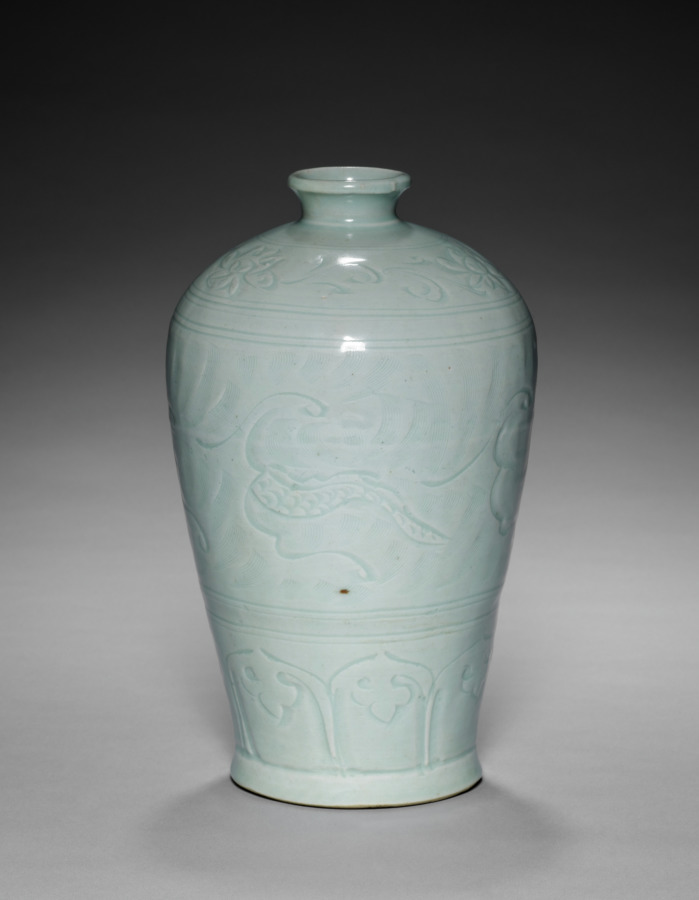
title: Meiping Vase with carved Dragon Motif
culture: South China, Yuan dynasty (1279–1368)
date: 1300s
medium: Porcelain with pale bluish-white (qingbai; 青白) glaze and carved decoration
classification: Ceramic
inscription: There are multiple self-adhesive labels on the bottom: 1. Square white (now yellowed with age) label with "90" written in red ink. 2. White rectangular label with "L.80.17.8" written in pencil. 3. Fabric tape cut to rectangular shape with "L.2161.49 /39" written in black ink. 4. White round label from Lally & Co. New York with "X2295" written in black ink.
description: A fierce coiling dragon chasing a pearl amid mist and clouds—a symbol of fertility and power—decorates this sturdy vase. Its shoulder is incised with a band of lotus flowers and the base features a border of lotus petals. Meiping, literally prunus vase, derives its name from being used to display a single floral spray, traditionally a branch of blossoming plum (or prunus), apricot, or cherry.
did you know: In Chinese mythology, the dragon is believed to transport human souls to the heavens after death.